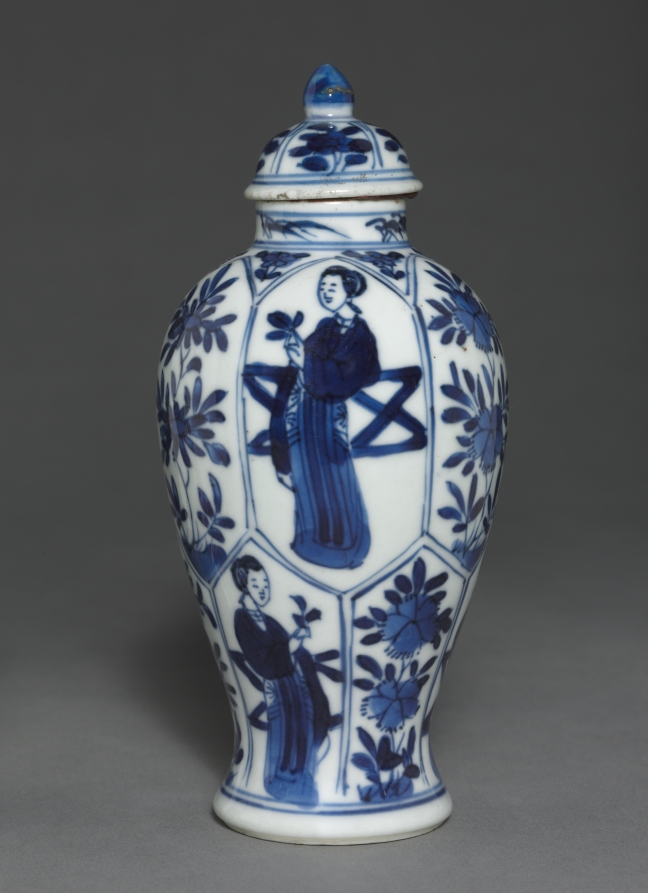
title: Jar with Cover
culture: China, Qing dynasty (1644-1911)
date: 19th Century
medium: porcelain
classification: Ceramic